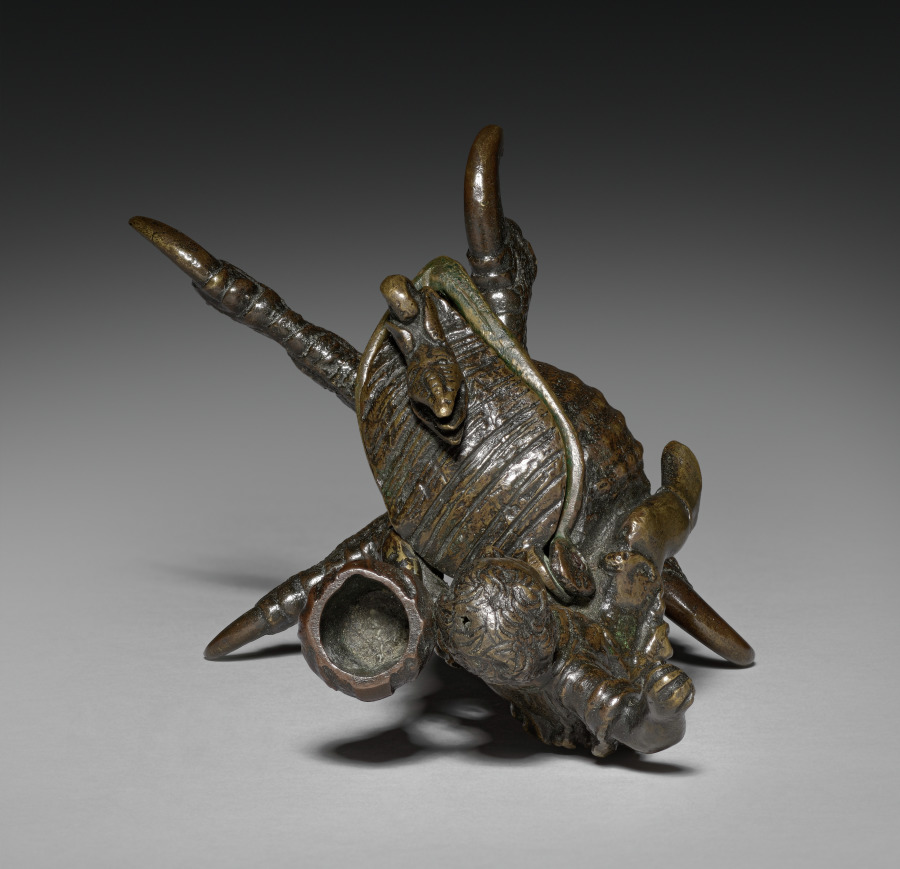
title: Inkwell and Candlestick with the Infant Hercules Killing the Serpents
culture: Italy, Ravenna, 16th century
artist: workshop of Severo da Ravenna (Italian, c.1496–c.1543)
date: c. 1510–20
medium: bronze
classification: Sculpture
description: In the early 1500s, Padua, a center of strong humanist traditions, encouraged the revival of classicism, and artists took their cues from descriptions in the works of classical authors. Classical small-scale bronzes grew in demand, and in response, the city's bourgeoning foundries produced a varied and extensive supply of small statues. Like many early Paduan bronzes, this work's utilitarian function—used to hold ink and to supply light—is complimented by its ornamental value. The base consists of an eagle claw, cast from life, supporting an equally realistic nautilus shell. Though medieval artists had occasionally used seashells to hold paints, the shell inkwell, whose small size makes it rather impractical to use, was a motif particular to Padua. Perched upon the shell is most likely Hercules, the son of Zeus. Perhaps aided by a staff (now missing) he is poised to strike a serpent, which according to myth was sent by Hera, the jealous wife of Zeus, to kill him. The dramatic opposition of hero and monster enhances the connection to the classical past, further meeting the desires of the educated patrons of Padua.